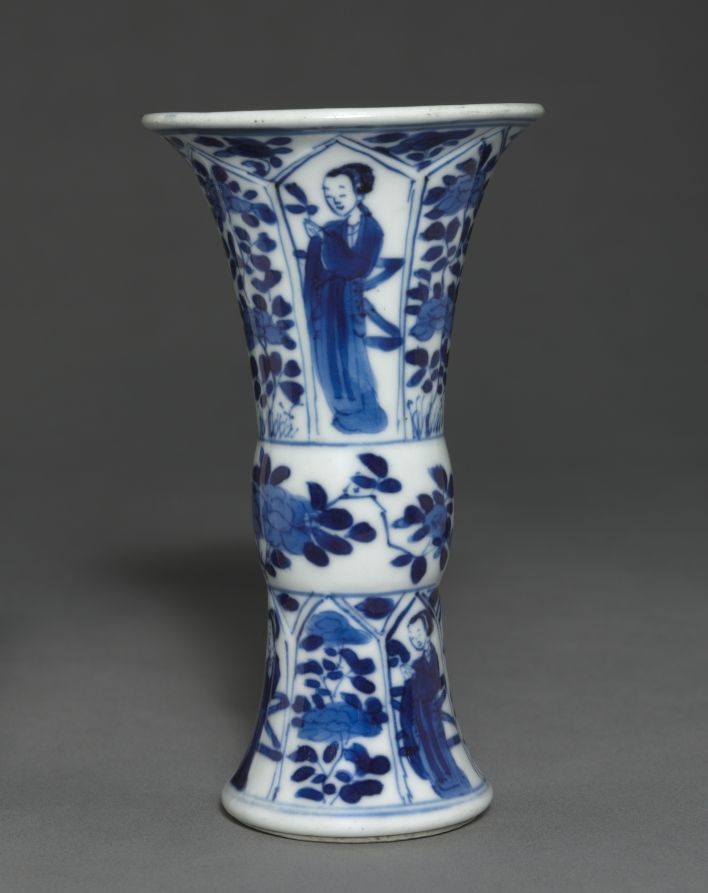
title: Beaker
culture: China, Qing dynasty (1644-1911), Daoguang reign (1821-1850) - Xianfeng reign (1851-1861)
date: 19th Century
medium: porcelain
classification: Ceramic